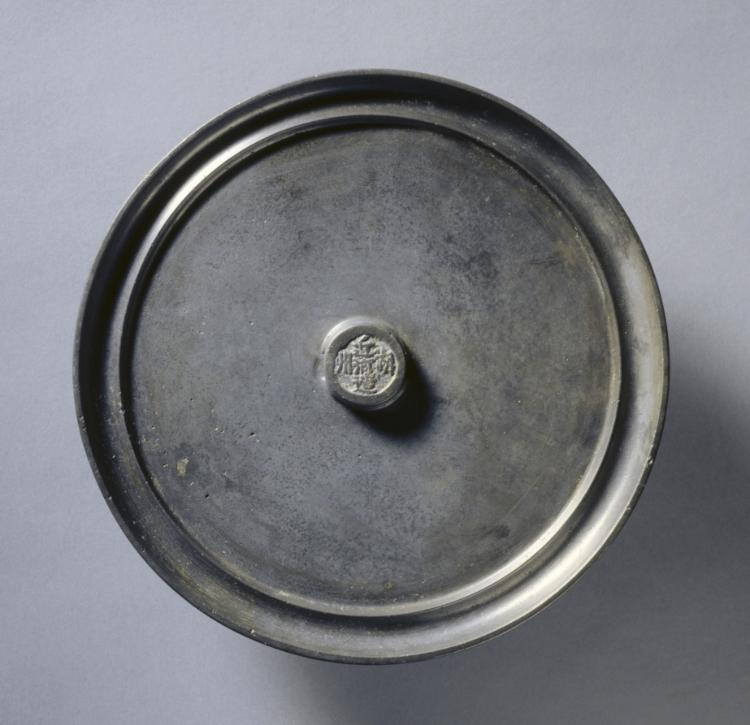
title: Huzhou Mirror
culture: China, Huzhou, Ming dynasty (1368-1644)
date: 1500s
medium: bronze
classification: Metalwork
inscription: 湖州近河造